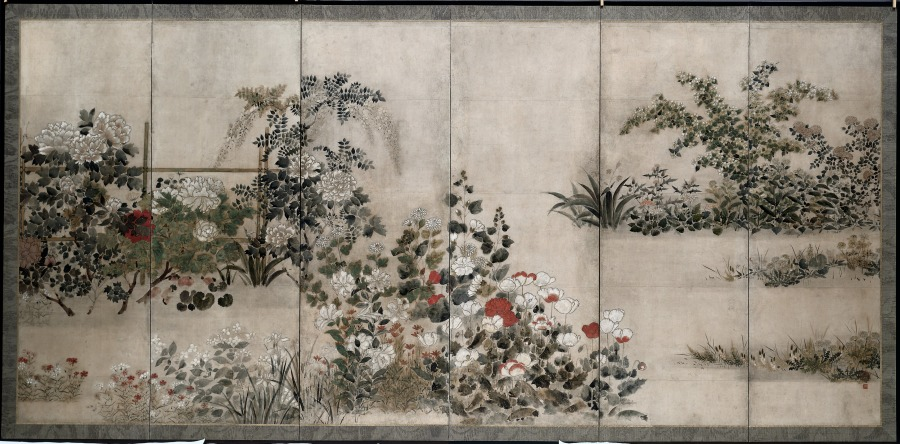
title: Flowers and Grasses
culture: Japan, Edo period (1615–1868)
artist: Kitagawa Sōsetsu (Japanese, active 1639–50)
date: mid-1600s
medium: Pair of six-panel folding screens; ink and color on paper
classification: Painting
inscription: two seals, lower left: "I-nen; Sosetsu"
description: Kitagawa Sōsetsu painted for the Maeda family, powerful rulers of what is present-day Ishikawa Prefecture on the central northern coast of Honshū, Japan’s main island. Screens served as room dividers and backdrops in Maeda grand residences. This composition is considered one of the artist’s masterpieces. Kitagawa Sōsetsu is thought to have been a student of Tawaraya Sōsetsu, who was in turn the student of Tawaraya Sōtatsu the Kyoto-based master painter regarded as the creator of the style that came to be known as Rinpa. By selecting a painter of this lineage, the Maeda family consciously connected their aesthetics to those of the imperial capital as a means of proclaiming their elevated status.